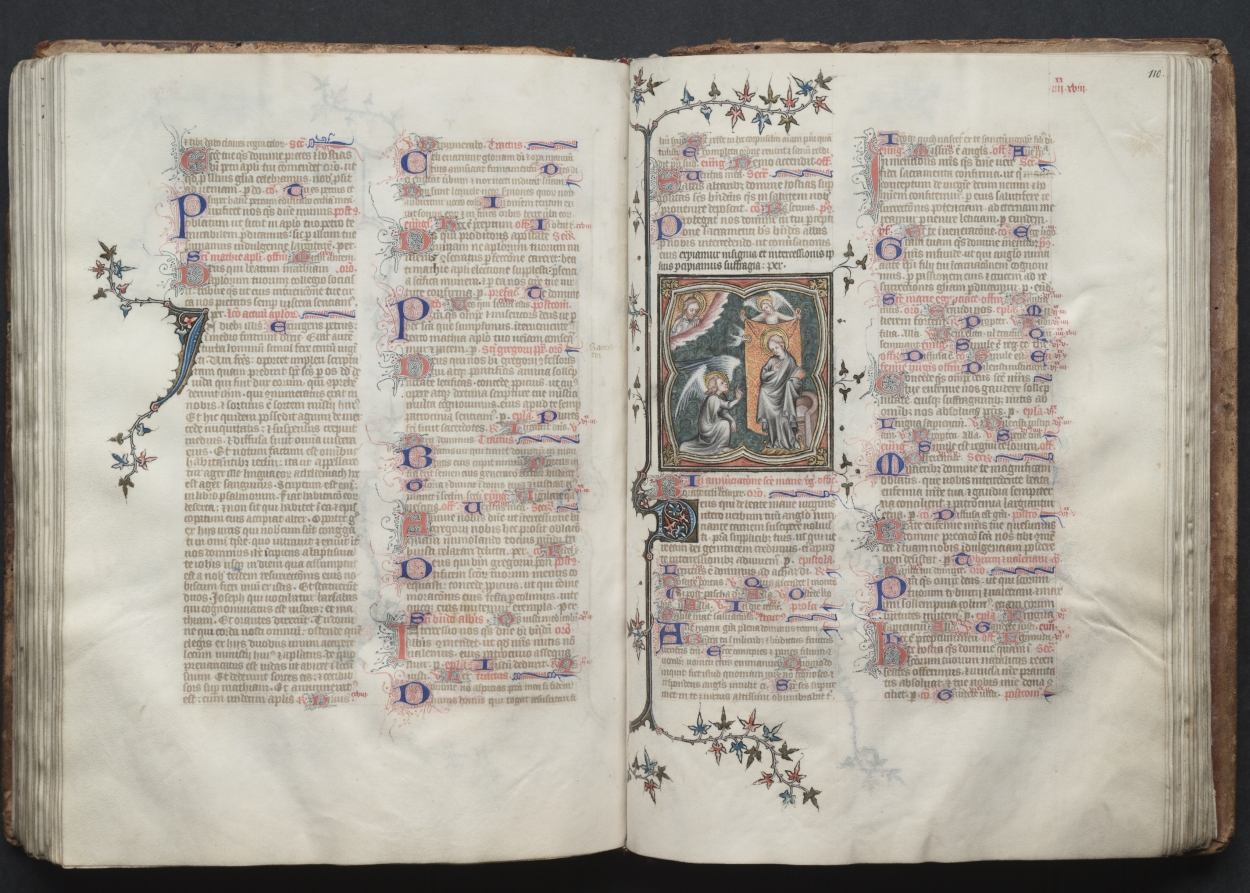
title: The Gotha Missal: Fol. 110r, The Annunciation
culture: France, Paris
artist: Master of the Boqueteaux (French)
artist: and Workshop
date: c. 1375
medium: ink, tempera, and gold on vellum; blind-tooled leather binding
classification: Bound Volume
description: The style and quality of this manuscript's decoration is typical of deluxe Parisian books made for aristocratic or royal patrons. Most of the book's decoration appears to be the work of the Master of the Boqueteaux, an artist active at the court of King Charles V (died 1380). His style was apparently shared by a number of book illuminators working in and around Paris. It is very possible that the Gotha Missal belonged to Charles V, but is not provable because the manuscript has no royal portraits and lacks a colophon. Given the book's magnificent decoration, however, it would seem that it was produced for a Valois prince, if not for the king himself. The manuscript receives its name from the German dukes of Gotha, its later owners.